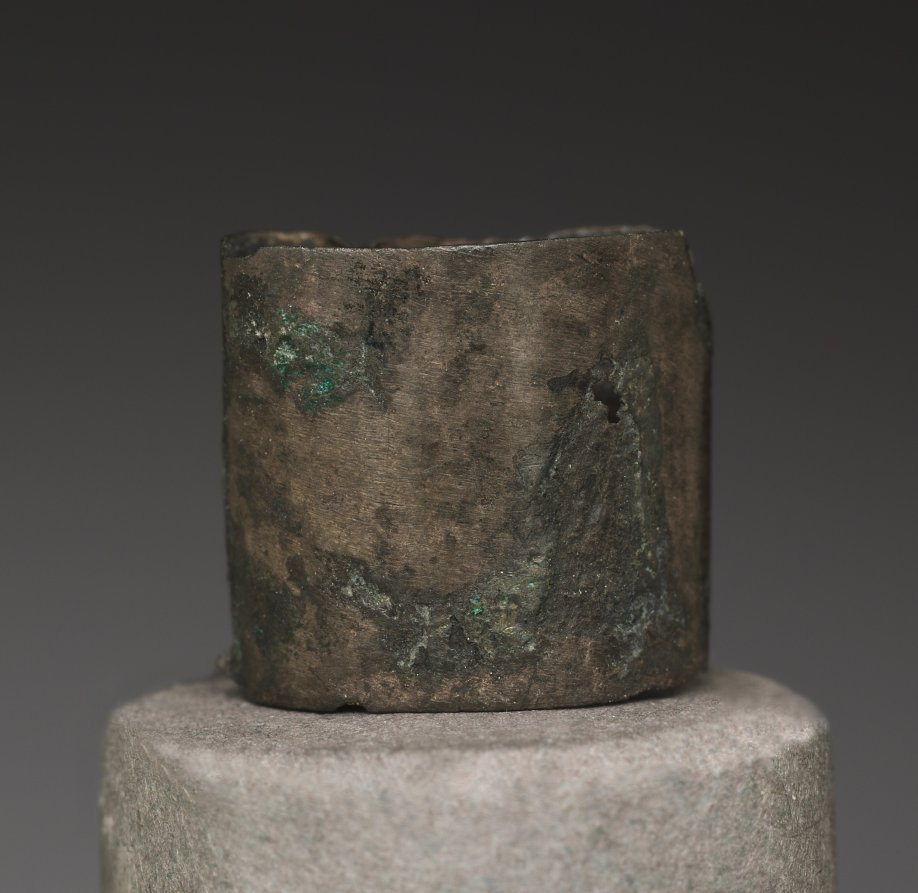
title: Element of Wig Decoration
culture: Egypt, Middle Kingdom (2040–1648 BCE), Dynasty 12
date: 1980–1801 BCE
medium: silver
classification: Jewelry